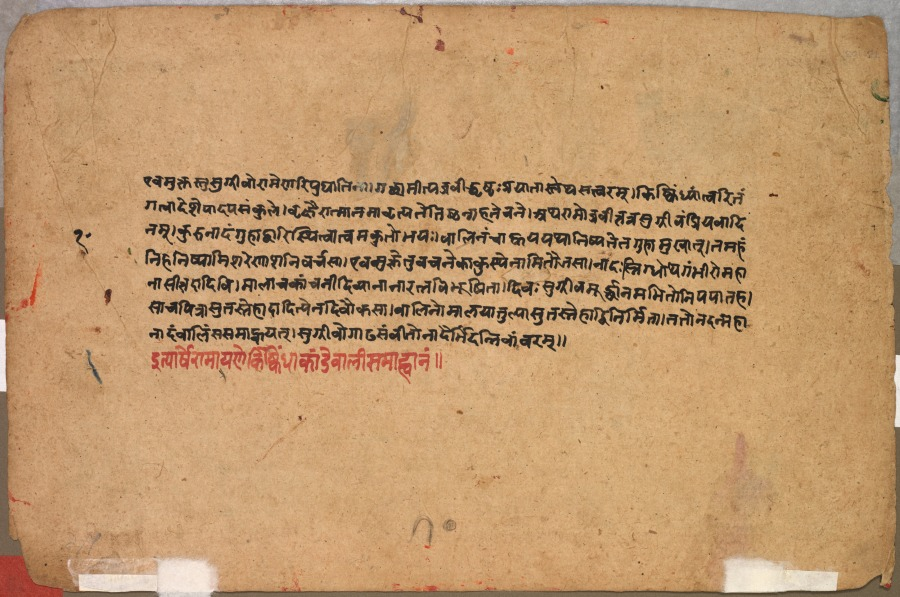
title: Sugriva challenges his brother Vali, King of the Forest Dwellers, to a duel, folio 10 from the Kishkindha Kanda (Book of Kishkindha) of a Ramayana (Rama’s Journey)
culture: Northern India, Pahari kingdoms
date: c. 1700–1720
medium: Gum tempera, ink, and gold on paper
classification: Painting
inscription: [[verso, in Sanskrit]] evamuktastu sugrīvo rāmeṇa ripu ghātina gachāmī tpajavī hṛīshṛī ghayā tāsteya satvaram. kiṣkimdhyaṁ tvaritaṁ gatvā deshe pādapa saṁkule. vṛikshairātmā tamāvrīptate tiṣṭha nāhate chate. atha rāmo javī tatra sugrīvaṁ priyavādi namra. kurunadaṁ guhādvāri sthitva tvama kuto bhayaḥ. vali taṁ chaṣkaya yathā niṣyate ta guhā mukhāt. tamahaṁ niha niṣyā miśareṇā śani varcasā. evamuktetu vacane kākusthe nāmi tau jasā. nādaḥ [a]sti gadhotha gambhīro mahānā sītthadā divi. mālāca kāṁcanī divyānā nā ratnā vibhūṣitā. divaḥ sugrīva mūrchānama bhito nipa pātaha. sāca pitrā sutaste hādā ditpe na divau kasā. vāli no mālayā tulyā sutaste hai nirmitā. tato nadanmahānādaṁ valiṁ samāiyat. sugrīvo gaḍha saṁvīto nā daiṁrmi danti vāṁvaram. ityārthe rāṃyaṇo kiṣkiṁdhākāṁde valī samāhvanaṁ.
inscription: [[verso, left center, in Devanagari script]] 10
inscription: [[verso, bottom center, in Takri script]] 10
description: In a morally ambiguous scene, the white monkey Sugriva calls to his brother Vali, the rightful king of the forest-dwellers, to emerge from a cave. Behind him, the blue hero Rama hides with his brother and monkey ally Hanuman. Clutching a deadly three-pronged arrow, Rama prepares to slay Vali, so Sugriva will rise as king and be obliged to help locate Rama’s lost wife. Paintings from this series illustrate a local Himalayan Ramayana. Their distinctive style incorporates rock formations and textiles reinterpreted from Mughal sources, probably brought to Nurpur when the Mughal emperor retreated there during the hot season.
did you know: The orange monkey Hanuman and the princes Lakshmana and Rama hide behind trees while Sugriva calls for Vali.